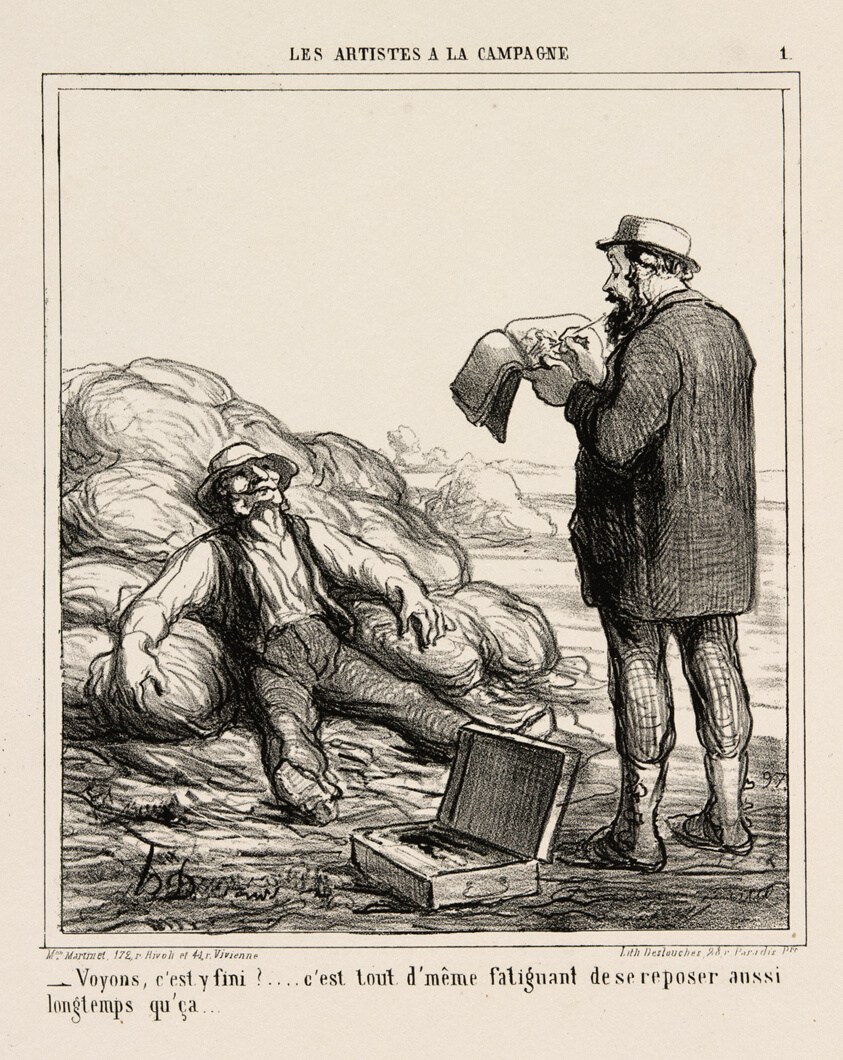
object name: Print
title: “- Well, are you finally finished?... after all it's tiring to relax for such a long time,” plate 1 from Les Artistes A La Campagne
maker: Honoré Victorin Daumier; French, 1808-1879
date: 1865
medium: Lithograph in black on ivory wove paper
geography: France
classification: lithograph; print; prints and drawing